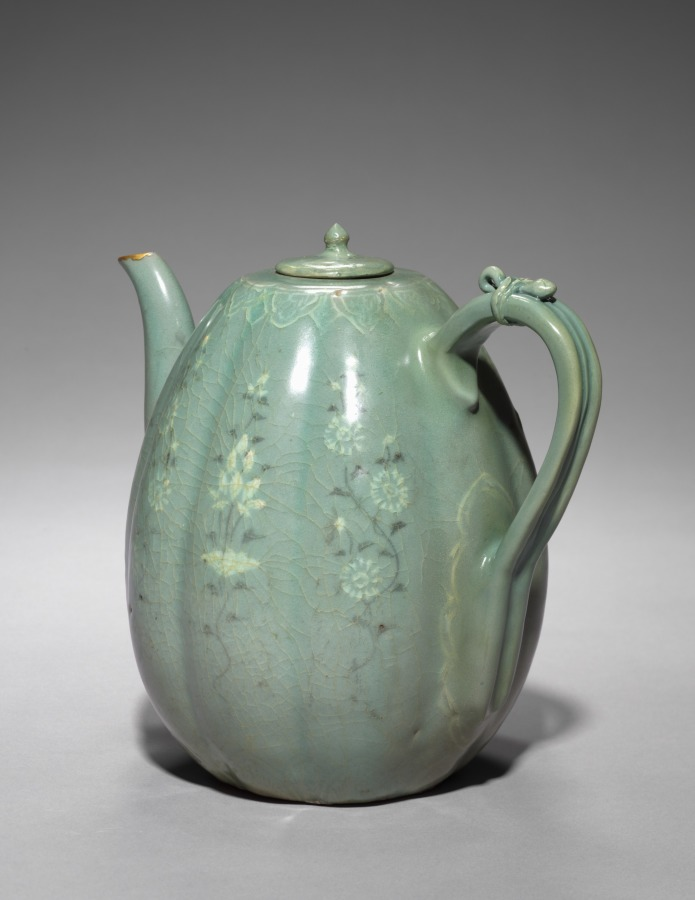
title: Melon-shaped Ewer with Incised Peony Design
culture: Korea, Goryeo dynasty (918–1392)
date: 1200s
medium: pottery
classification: Ceramic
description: This melon-shaped pitcher is adorned with a delicate drawing that renders chrysanthemum buds with full blossoms in white and black inlays. In Korea, chrysanthemum flowers and leaves were made into both tea and wine. Chrysanthemum wine was enjoyed during the the Double Nine Festival (the ninth day of the ninth month in the lunar calendar) when praying for longevity.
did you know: The shape of this pitcher resembles a type of yellow muskmelon cultivated mainly in East Asia.